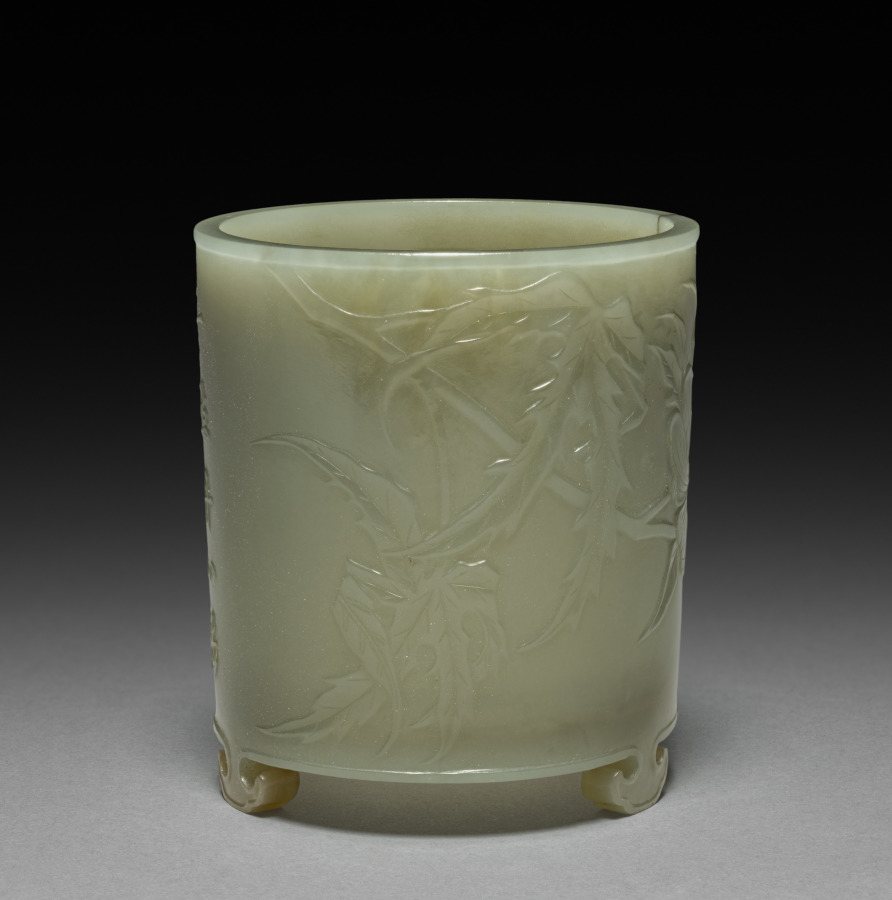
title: Cylindrical Container with Mallows and Inscription in Relief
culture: China, Qing dynasty (1644–1911), Qianlong reign (1736–95)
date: 1736–95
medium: white jade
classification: Jade